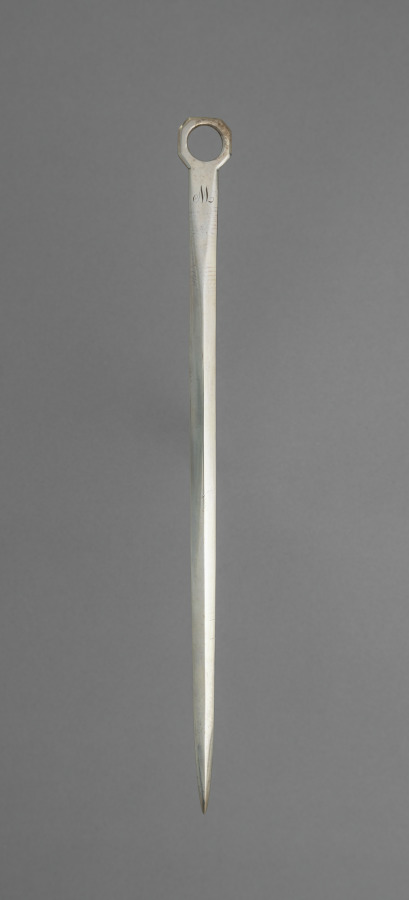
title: Skewer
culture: Europe, late 19th - early 20th century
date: late 1800s - early 1900s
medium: silver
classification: Silver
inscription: engraved "M" in script just below ring at end.